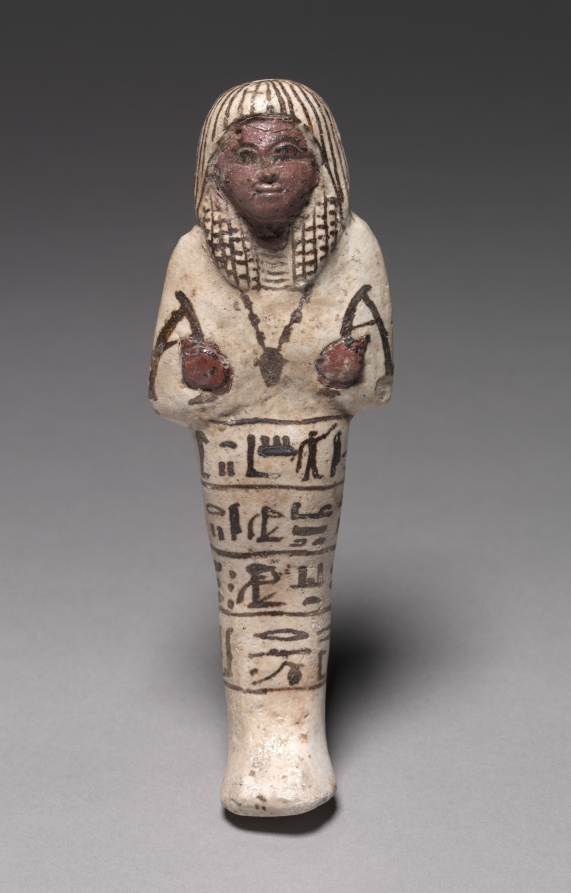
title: Shawabty of Djehutymose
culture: Egypt, New Kingdom (1540–1069 BCE), Dynasty 19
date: c. 1279–1213 BCE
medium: polychrome faience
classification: Funerary Equipment